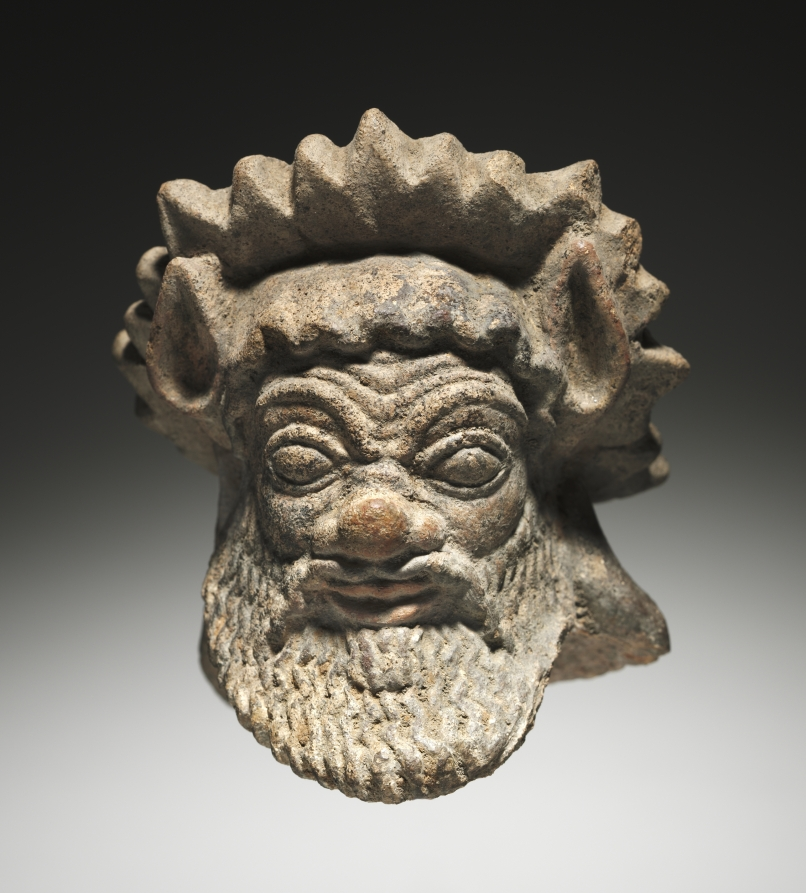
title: Satyr Head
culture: Etruscan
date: 500s BCE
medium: terracotta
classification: Sculpture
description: This head of an equine-eared satyr likely comes from a mold-made terracotta antefix. He has a wide nose, a furrowed brow, and almond-shaped eyes. Traces of pigment remain in the wavy incised beard and lips. A garland, perhaps made of pointed leaves, adorns the hair. It was likely part of a larger Etruscan temple antefix of an intertwined satyr and maenad because of its identical nature to other satyr heads from complete antefixes.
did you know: Satyrs are nature spirits and followers of the wine god Dionysos.